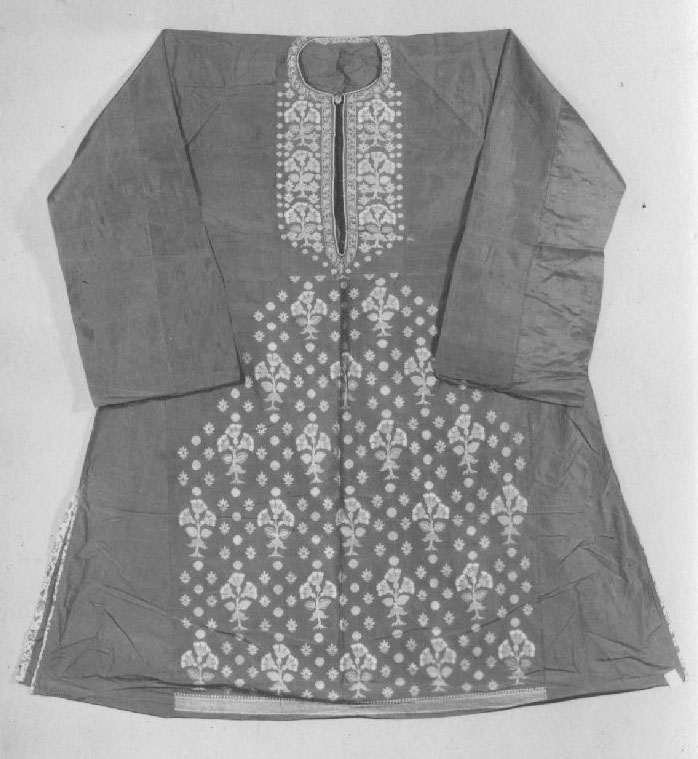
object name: Costume and Accessories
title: Tunic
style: 18th Century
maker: Iran (Persia)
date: 18th century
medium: Silk, gilt-wrapped silk; plain weave, brocading wefts; block printed, attached braided cord at collar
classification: textile; costume; weaving; dress (garment); clothing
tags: floral motifs, roses, flowers, carnations, circles